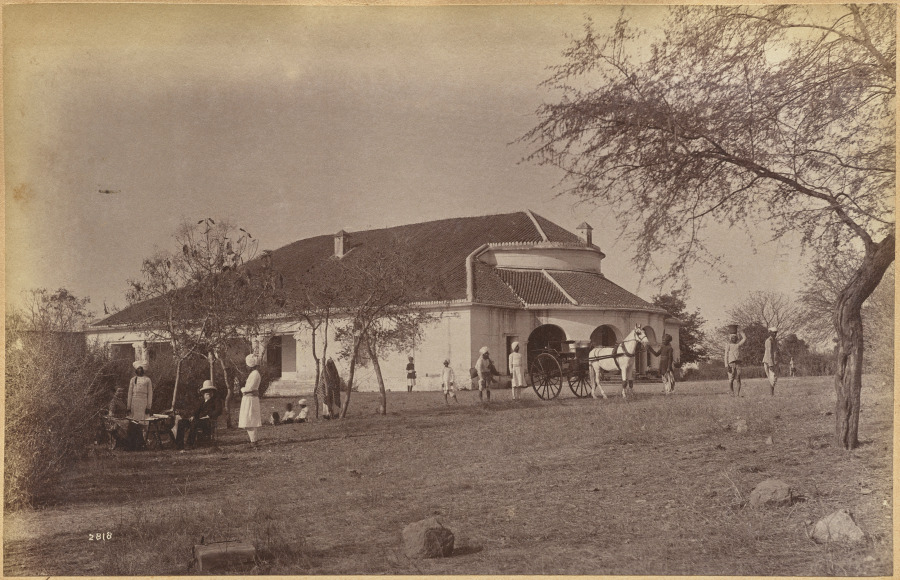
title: Reverend Holcomb's Bungalow (verso, top)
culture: India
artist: Raja Deen Dayal (Indian, 1844–1905)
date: c. 1882–87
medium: albumen print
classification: Photograph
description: These photographs are part of an album, now disassembled, of around 105 photographs taken in India between 1885 and summer 1887 that provide glimpses into the lives of the British colonial elite and royal and upper-class Indians. The museum holds another group of 37 pictures from this album (2016.266), which was probably commissioned by a British civil servant visiting or working in India around 1888 as a personal souvenir of his experiences there.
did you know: Raja Deen Dayal is regarded now, and was considered during his lifetime, to be India’s most important 19th-century photographer.